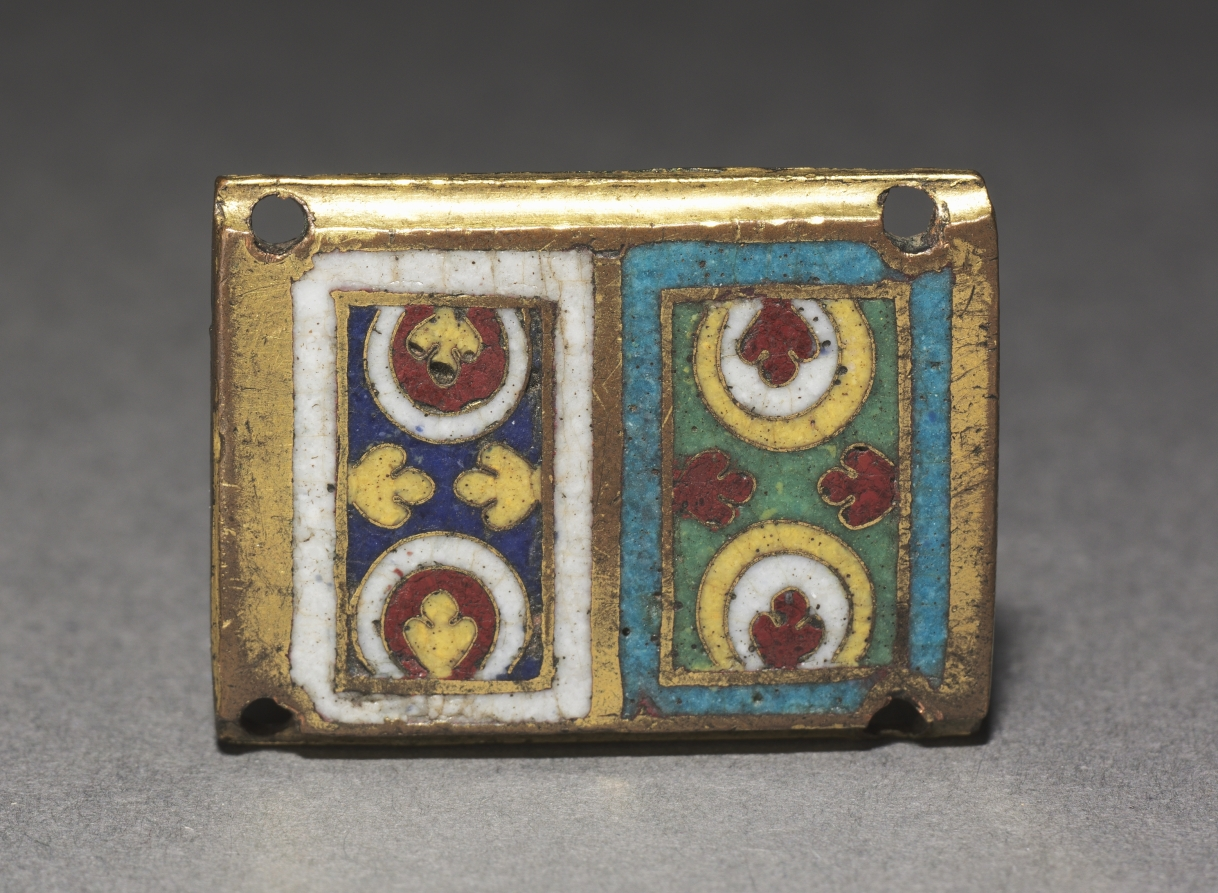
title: Plaque from a Reliquary Shrine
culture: Germany, Rhine Valley, Cologne, Romanesque period, 12th century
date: c. 1170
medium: gilded copper; champlevé and cloisonné enamel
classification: Enamel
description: These decorative enamel plaques (1953.274, 1953.638, 1957.502, and 1961.27) have been linked to some of Cologne's most important reliquary shrines, namely the shrine of the Three Kings at Cologne Cathedral and the shrines of Saints Maurinus and Albinus in the Benedictine abbey church of Saint Panteleon.